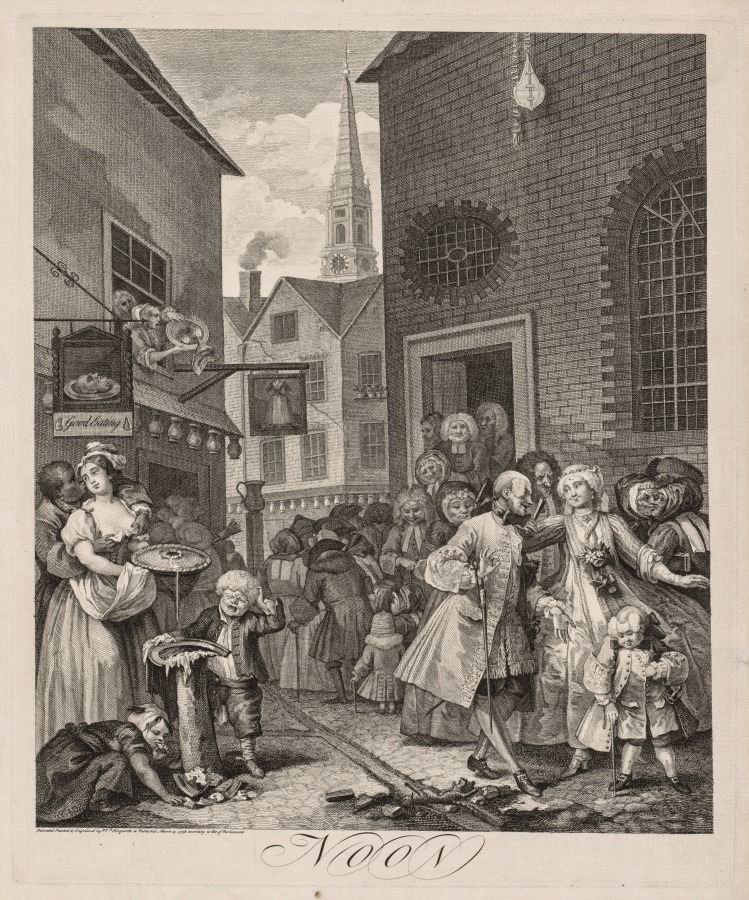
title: The Four Times of Day: Noon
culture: England, 18th century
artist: William Hogarth (British, 1697–1764)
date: 1738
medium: engraving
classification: Print